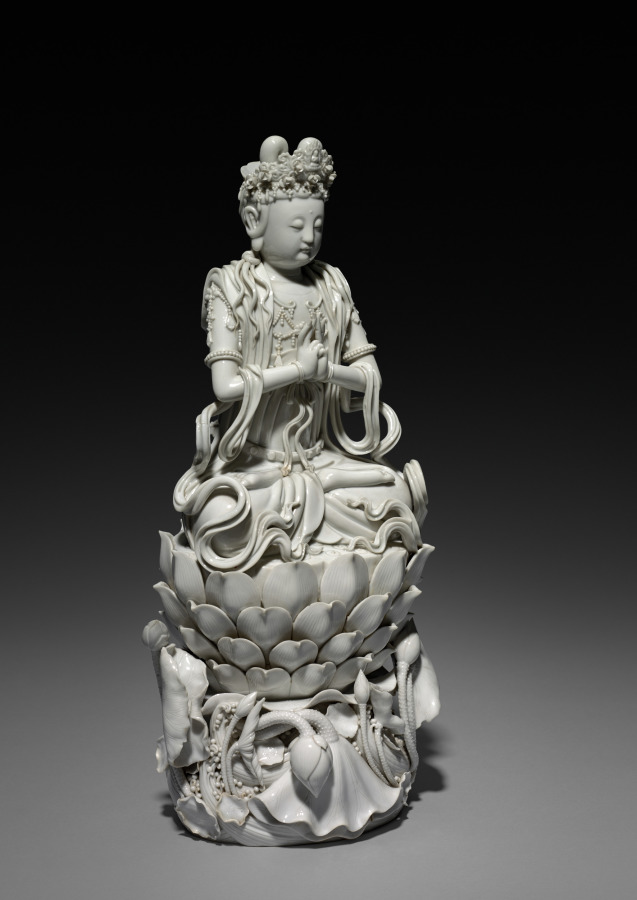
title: Bodhisattva Guanyin of the South Sea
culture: China, Fujian Province, Ming dynasty (1368-1644) - Qing dynasty (1644-1911)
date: 1600s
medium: Porcelain with white glaze, Dehua ware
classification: Ceramic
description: Guanyin, the Buddhist bodhisattva of infinite compassion (Avalokiteshvara in Sanskrit), is the most revered enlightened being in East Asia. The bodhisattva perceives all beings in need of help and reveals himself in many forms. Here, his elaborate lotus pedestal rests on the crest of surging waves, identifying him as Guanyin of the South Seas. The Dehua kilns in Fujian province in southern China produced white porcelain figures for both the domestic and export markets. In China, such a figure may have furnished a house altar or a temple.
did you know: When Marco Polo visited China in the late 1200s, he was so impressed by the Dehua kilns that he included lengthy descriptions of ceramic production in his chronicle of his journey.